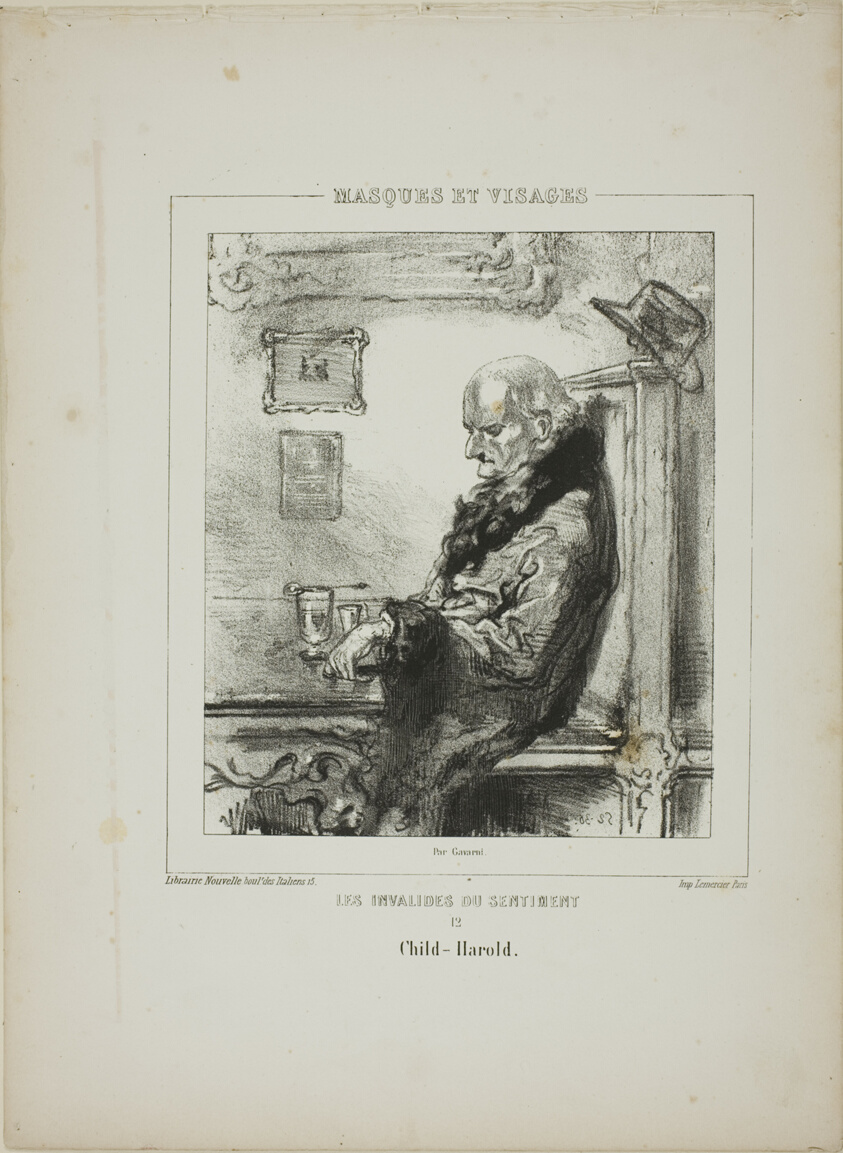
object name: Print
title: Les Invalides du Sentiment: Child-Harold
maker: Paul Gavarni (French, 1804-1866)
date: 1852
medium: Lithograph in black on cream wove paper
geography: France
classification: lithograph; print; prints and drawing